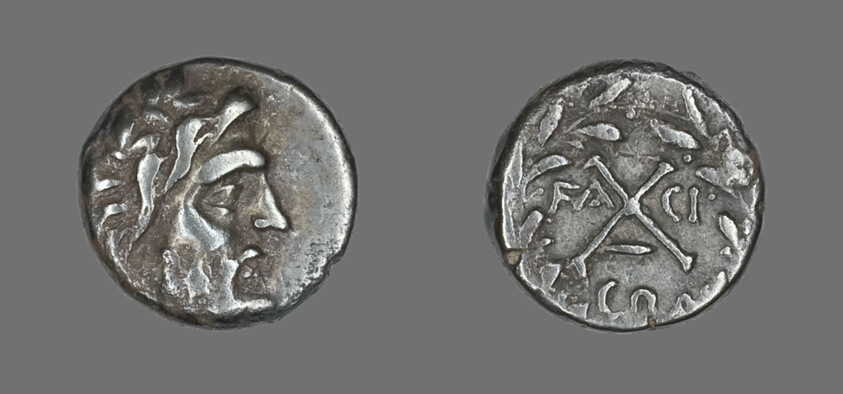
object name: Coin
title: Hemidrachm (Coin) Depicting the God Zeus Amarios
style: greek, ancient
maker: Greek; Elis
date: 191-146 BCE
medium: Silver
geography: Ancient Greece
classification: coin; ancient art